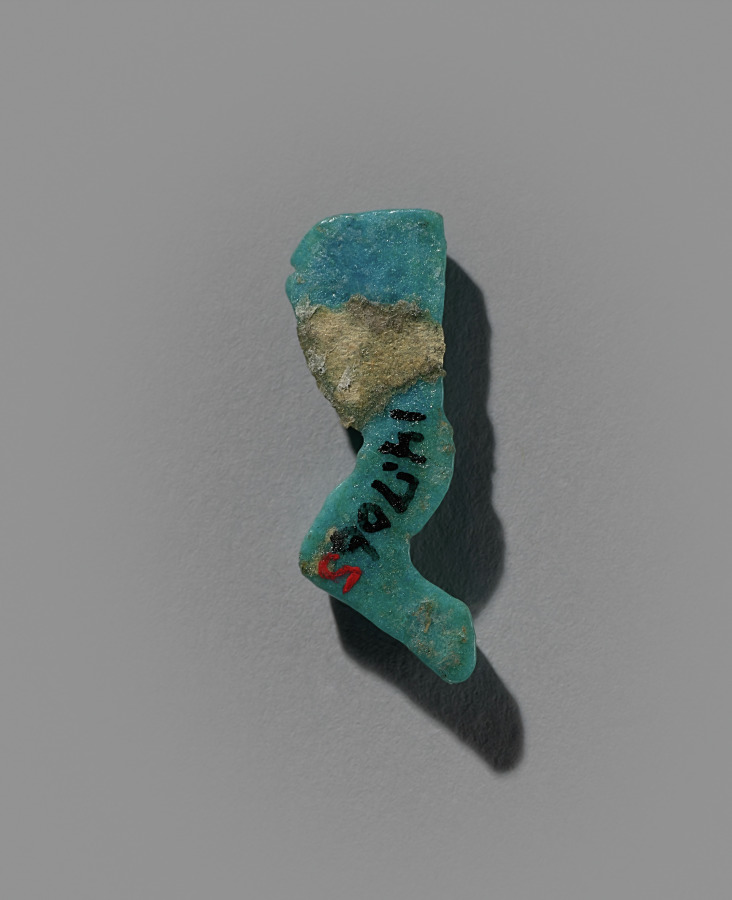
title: Food Model Amulet: Haunch of Beef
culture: Egypt, New Kingdom (1540–1069 BCE), Dynasties 19–20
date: 1295–1069 BCE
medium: turquoise faience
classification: Amulets